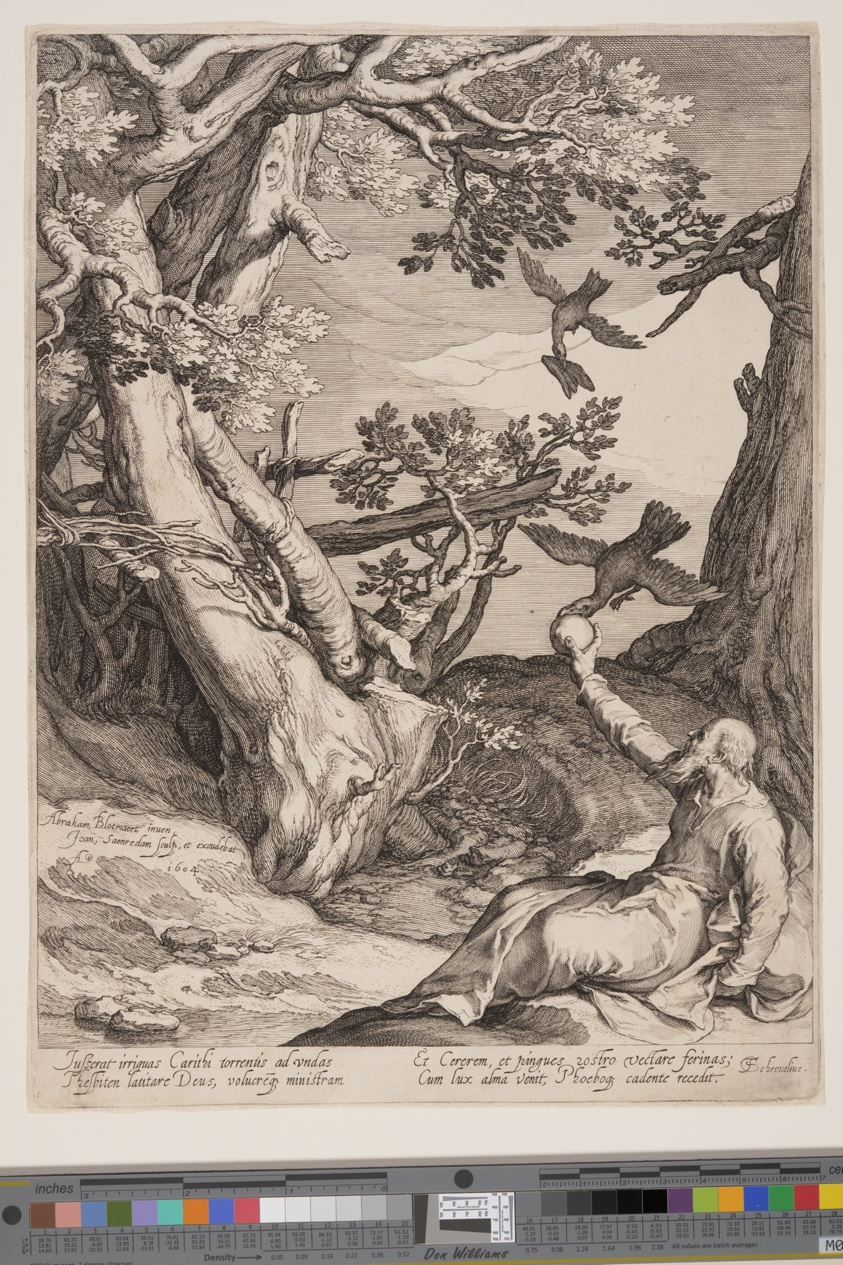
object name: Print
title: Elijah in the Wilderness Fed by Ravens, from Four Scenes from the Life of the Prophets, Isaiah, Ahajah and Elisha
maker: Jan Saenredam (Dutch, 1565–1607); after Abraham Bloemaert (Dutch, 1566–1651)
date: 1604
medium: Engraving on ivory laid paper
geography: Netherlands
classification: print; paper; prints and drawing; engraving